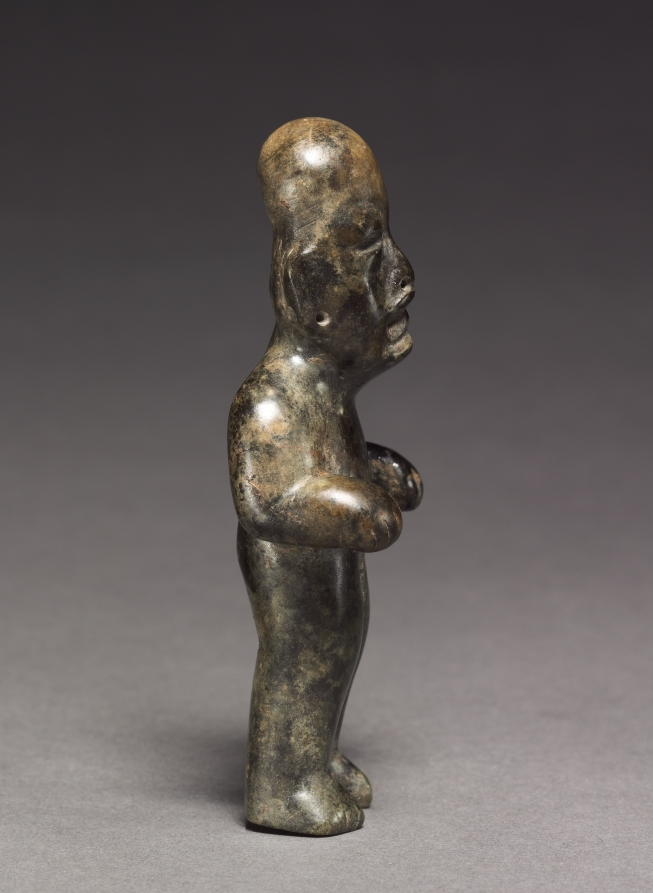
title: Standing Figure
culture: Mesoamerica, Mexico, Olmec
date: c. 900–400 BCE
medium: serpentine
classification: Sculpture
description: The Olmec were Mesoamerica's greatest lapidaries; their work in jade and serpentine was prized by both contemporary and later Mesoamerican cultures. Human beings were jaguar traits (such as the downturned mouth and paw-like hands of this figurine) are common in Olmec art. Such creatures were probably believed to possess supernatural powers.